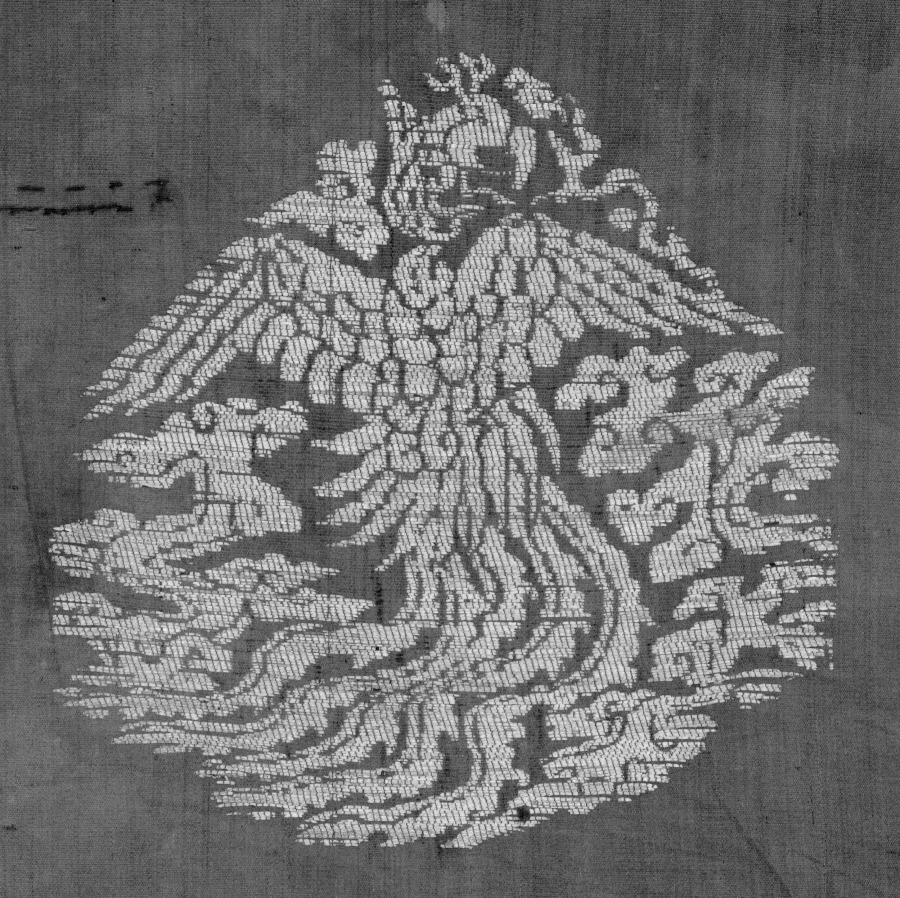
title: Brocade with Soaring Phoenixes among Clouds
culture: China, Jin dynasty (1115–1234)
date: 1100s–1200s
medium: Silk and gold thread; tabby, brocaded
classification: Textile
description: The gold-brocaded designs of Jin brocades, such as this example with graceful phoenixes soaring into clouds, are typically asymmetrical. Moreover, they have no frame or border, and appear to have been cut out of larger decorative images.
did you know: Textiles like this, which were probably exported from China to Iran, helped transmit the phoenix motif into Ilkhanid decorative arts.